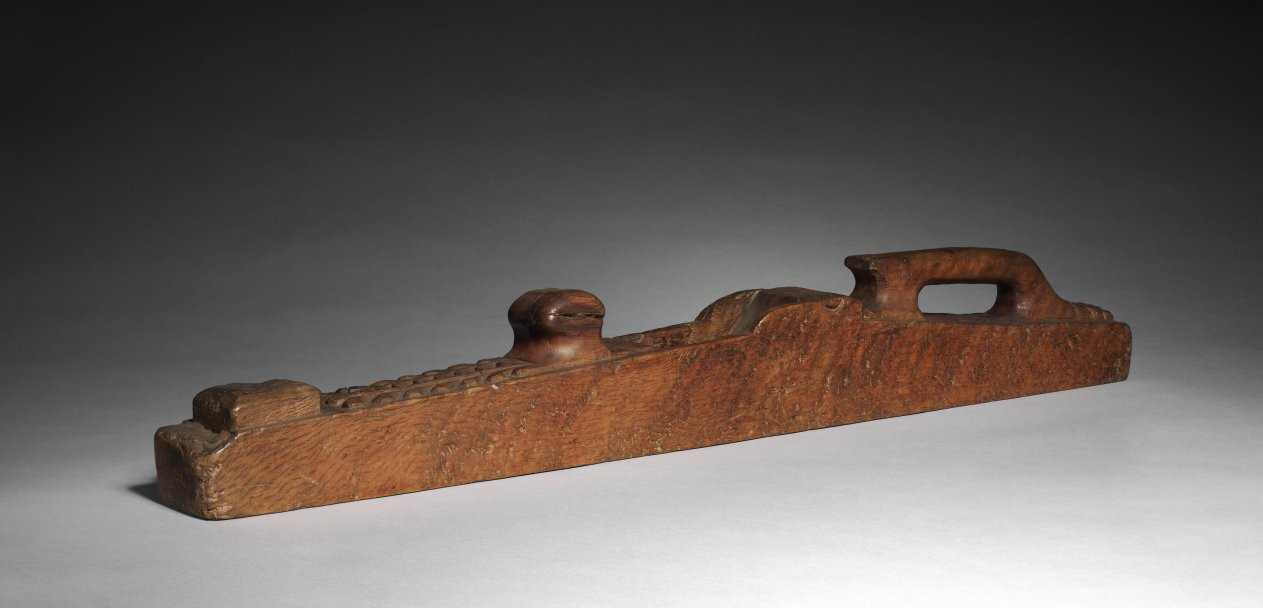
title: Plane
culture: France, 17th century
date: 1600s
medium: wood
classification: Tool